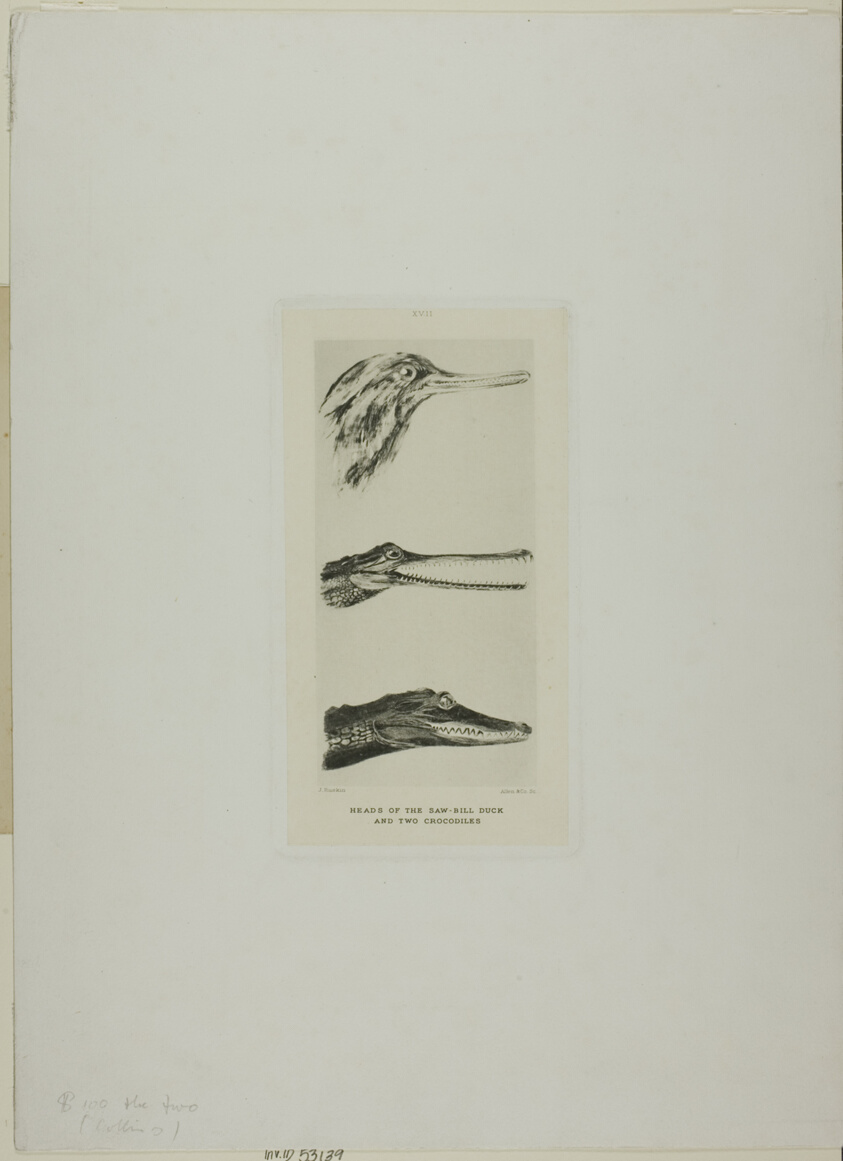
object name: Print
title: Heads of Saw-Bill Duck and Two Crocodiles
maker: John Ruskin (English, 1819-1900)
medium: Relief etching on paper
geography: England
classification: relief etching; print; prints and drawing